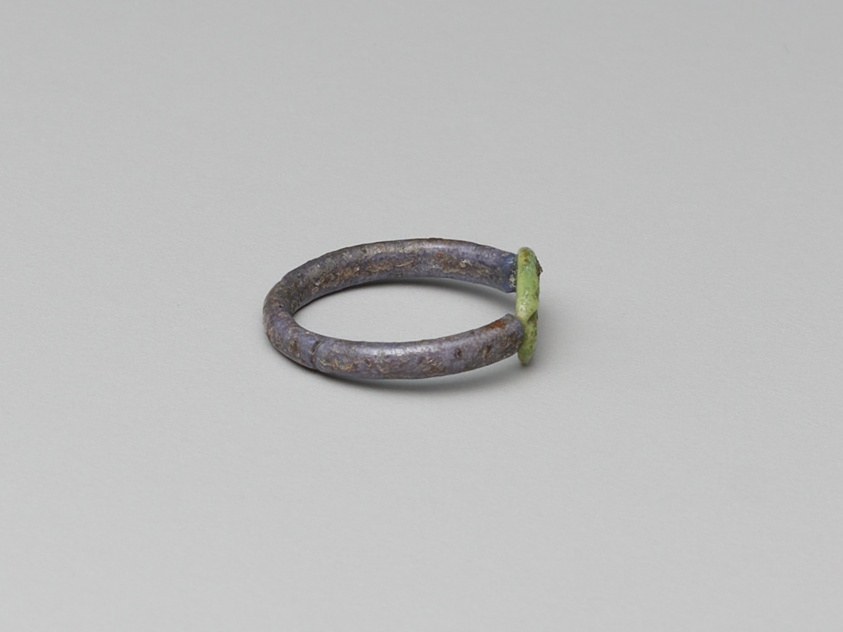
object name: Costume and Accessories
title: Finger Ring with the Throne Name of King Psusennes II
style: third intermediate period, twenty-first dynasty, egyptian, ancient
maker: Egyptian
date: Third Intermediate Period, Dynasty 21, reign of Psusennes II (about 959–945 BCE)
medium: Faience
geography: Egypt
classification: ring (jewelry); ceramics; jewelry; ancient art; costume; faïence (composite material)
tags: Hieroglyphs, pharaohs, kings